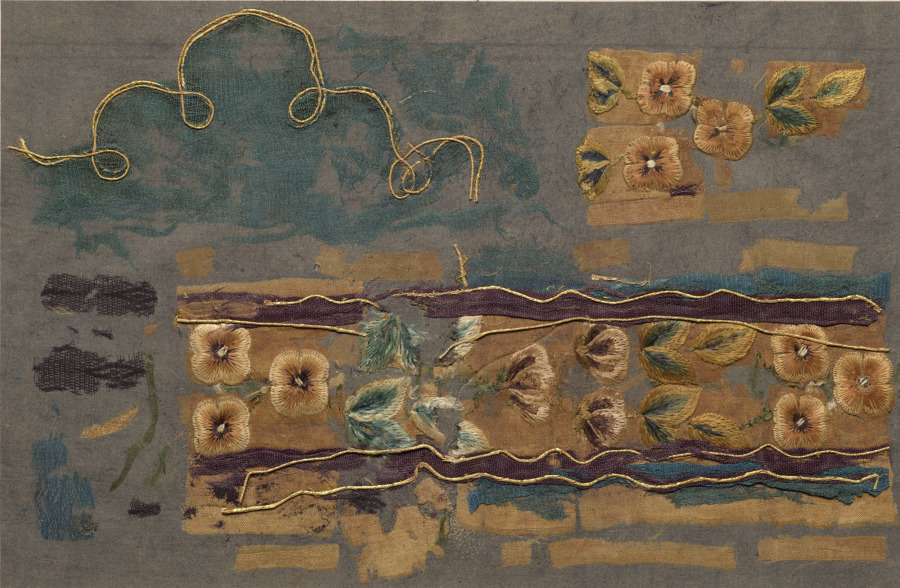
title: Embroidered Fragments Mounted as One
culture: China or Japan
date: 700s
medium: embroidery, silk and gold thread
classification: Textile